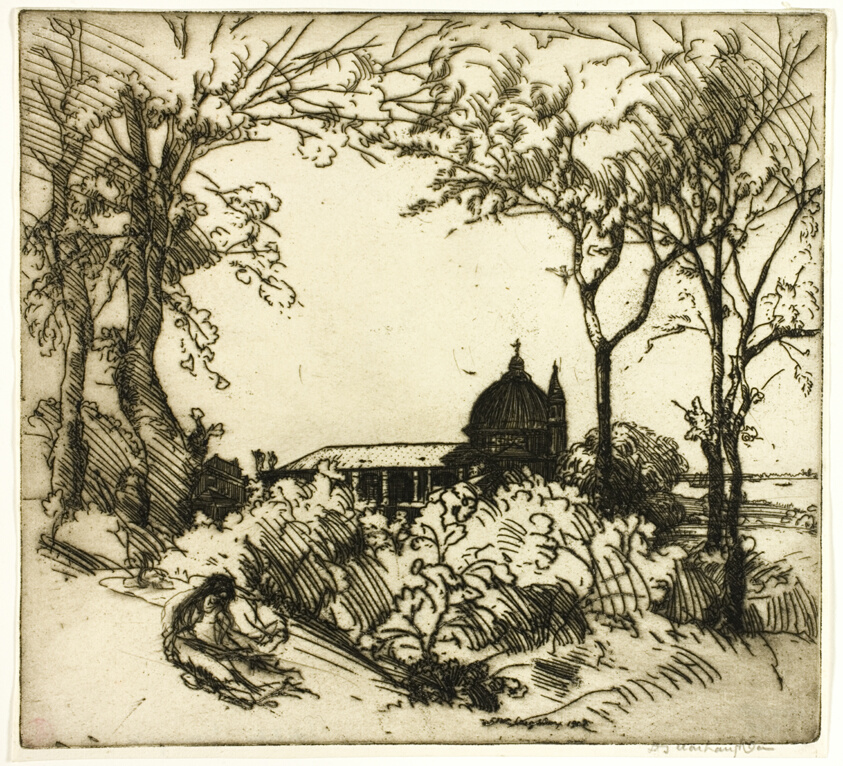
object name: Print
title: Idillio, Venice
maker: Donald Shaw MacLaughlan (American, born Canada, 1876-1938)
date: 1908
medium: Etching in black on off-white laid paper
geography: United States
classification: etching; print; prints and drawing